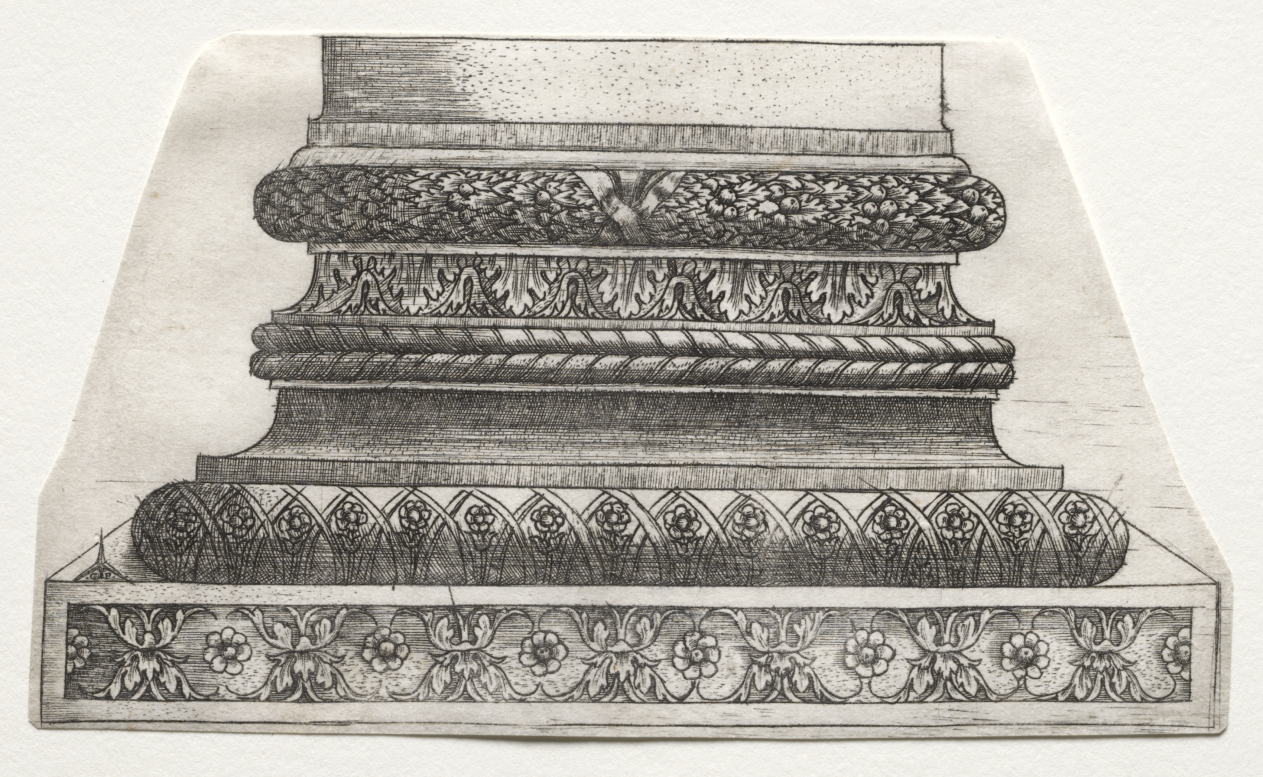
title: Base and Capital with Figure of Fame and Winged Horses (base)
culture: Italy, 16th century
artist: Master G. A. with the man-trap (Italian, active 1525–50)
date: c. 1525–1550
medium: engraving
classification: Print